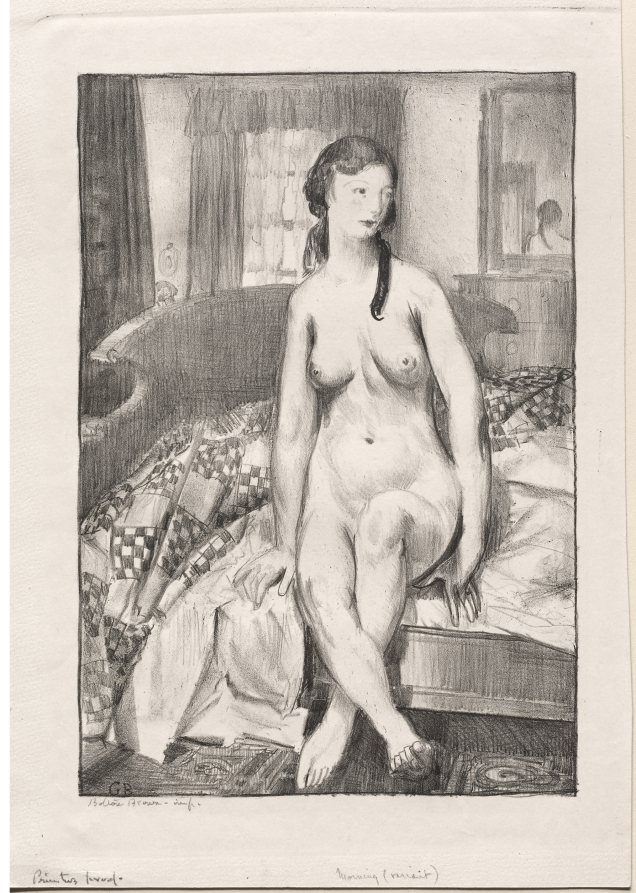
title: Morning, Nude on Bed, First Stone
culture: America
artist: George Bellows (American, 1882–1925)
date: 1921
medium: lithograph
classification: Print